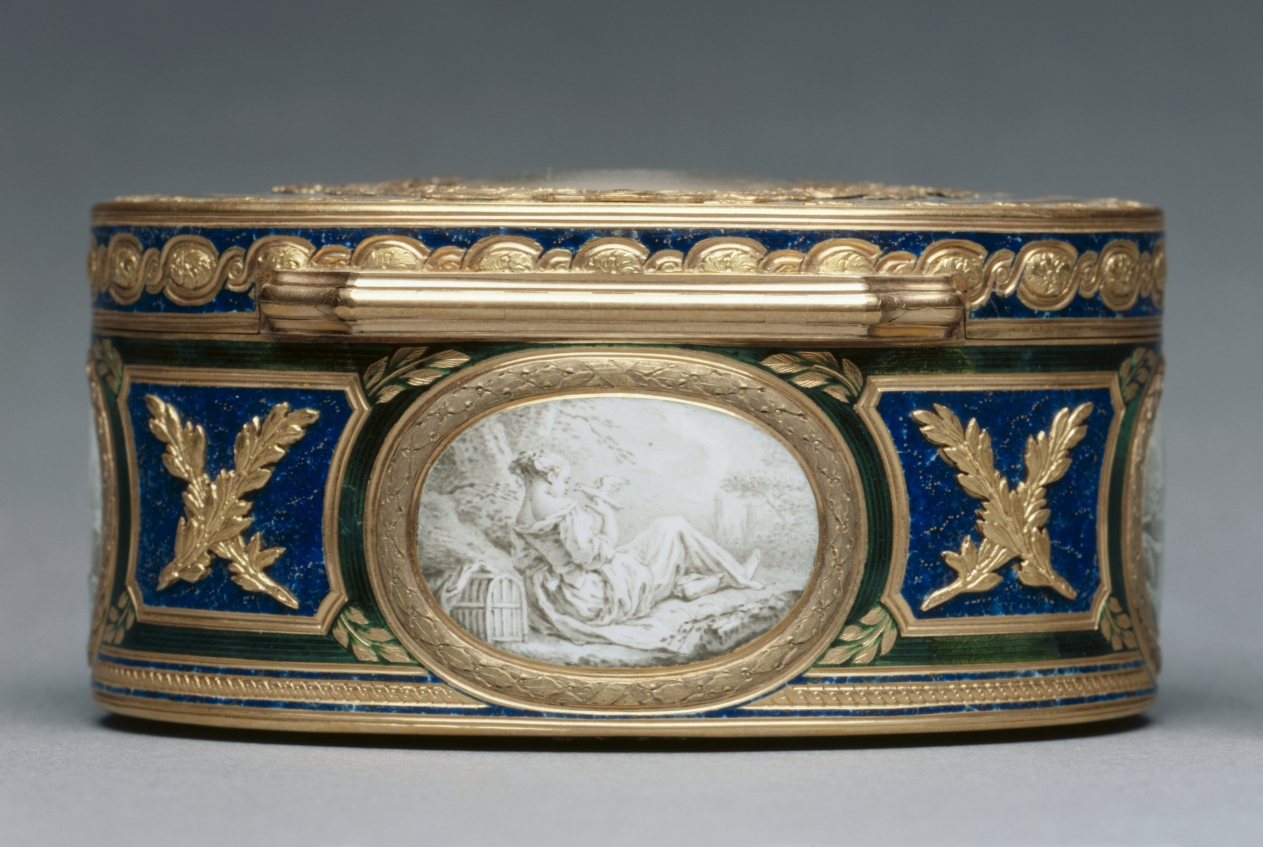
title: Snuff Box (Tabatière) with Portrait of Marie Antoinette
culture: France, 18th century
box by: Pierre-François-Mathis de Beaulieu (French)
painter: François Dumont (French, 1751–1831)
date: 1768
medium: watercolor on ivory in a gold and enamel box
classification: Enamel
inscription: [Maker's mark of Pierre-François-Mathis de Beaulieu, master goldsmith in 1768, inside cover]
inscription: [Charge mark of Jean-Jacques Prévot, 1762-1768, inside cover]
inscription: [Warden's mark of Paris, 1768-1769, inside cover]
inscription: [Discharge mark of Julien Alaterre, Paris, 1768-1774, on neck at right]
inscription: [Inside box, the letter]: "F"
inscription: [On bezel at left, engraved number]: "627"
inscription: [On front of bezel, engraved signature]: "Ve Georges Beaulieu à Paris"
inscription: [On right of miniature portrait, the letter]: "D"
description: This box was created through the collaboration of two skilled and well-known artisans of the period, master goldsmith Pierre-François-Mathis de Beaulieu and celebrated miniature painter François Dumont. The portrait of Marie Antoinette on the box's lid is painted in Dumont’s own style while those on the sides and bottom of the box take inspiration from the work of painter François Boucher, known for his pastoral scenes in the Rococo style.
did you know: Marie Antoinette, queen consort of French King Louis XVI and great patron of the decorative arts, was executed in 1793 at the end of the French Revolution.